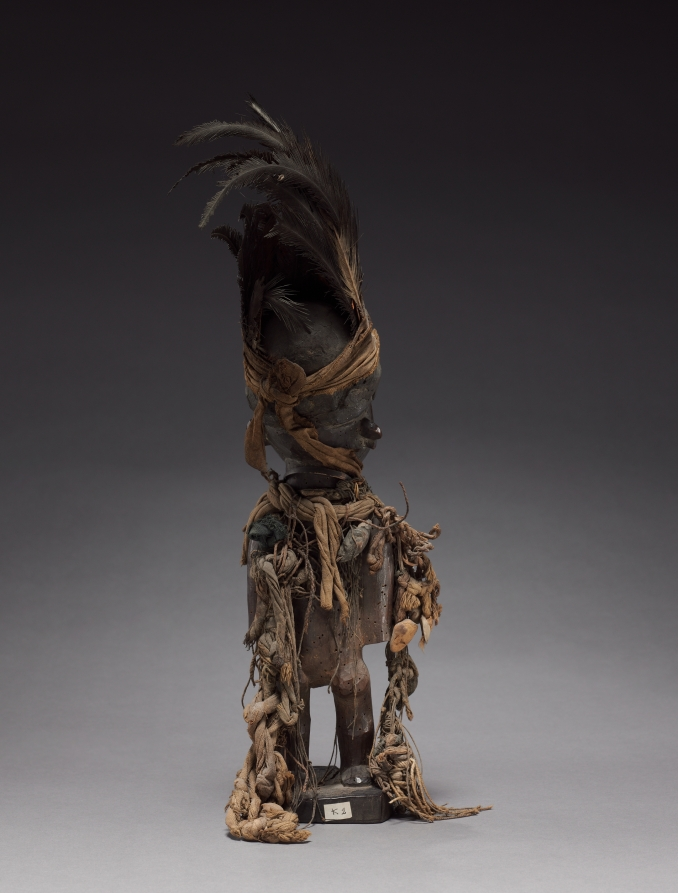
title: Male Figure (Nkisi)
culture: Africa, Central Africa, Democratic Republic of Congo, Cabinda, or Republic of the Congo, probably Vili-style maker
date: late 1800s-early 1900s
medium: Wood, cloth, resin, organic material, feathers, natural fibers, antelope horn, seashells (including cowrie shells), glass beads, metalized glass, and plant fiber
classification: Sculpture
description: Nkisi is an object that is believed to host an ancestral spirit. Unusual among these figures, this nkisi figure is missing its nduda, “night guns.” These guns would be filled with gunpowder functioning as defense against witches or misfortune. Unless its guns were lost during the course of its life history, this nkisi may instead be an example of a more general type called mpanzu, whose functions included protection.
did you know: Different from other figures functioning as defense against witches or misfortune, its “night guns,” or nduda, are missing.